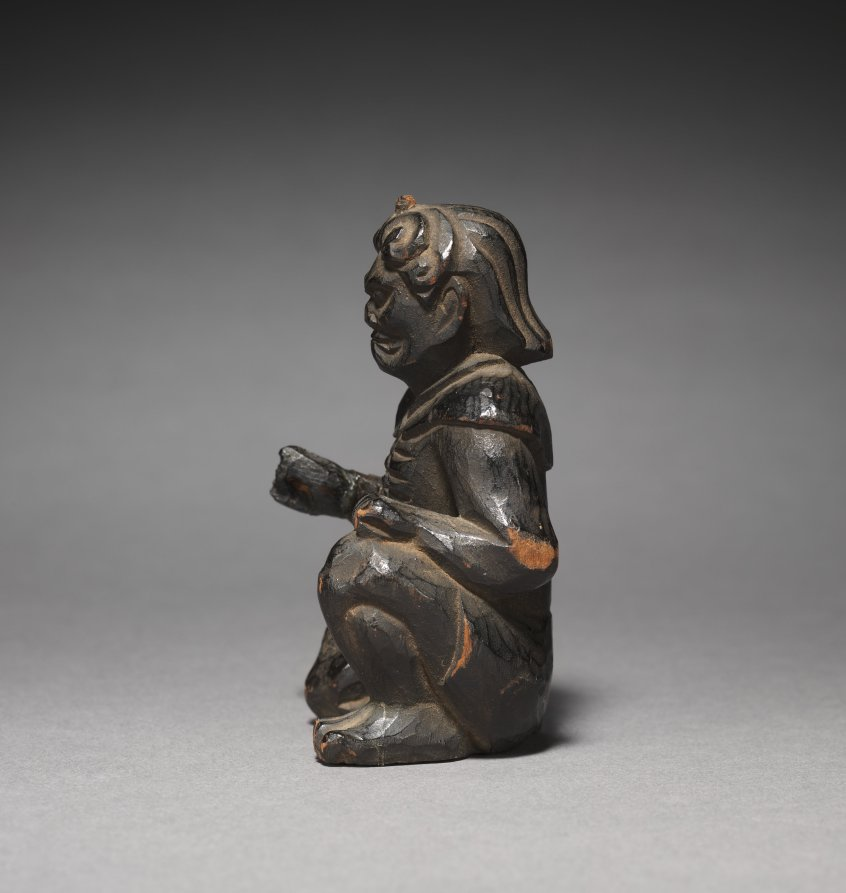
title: En no Gyōja with Zenki and Kōki (Zenki)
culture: Japan, Edo period (1615–1868)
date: 1615–1868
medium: wood and paint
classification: Sculpture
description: This is one of a trio of figures identified as Enno Gyoja and his two attendants, Zenki and Kōki. The set follows the iconography of Shugendo, the traditional mountain ascetic practice in Japan. Enno Gyoja is depicted as a hermit-monk, seated on a rock attached to a modern base. He holds a staff in his right hand and a sutra in the left. The two attendants take the form of half-human, half-demonic figures and are regarded as a married couple.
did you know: This Edo period sculpture shares the iconography and religious function with Seated Zenki and Kōki, CMA 2012.40, from the earlier Muromachi period.